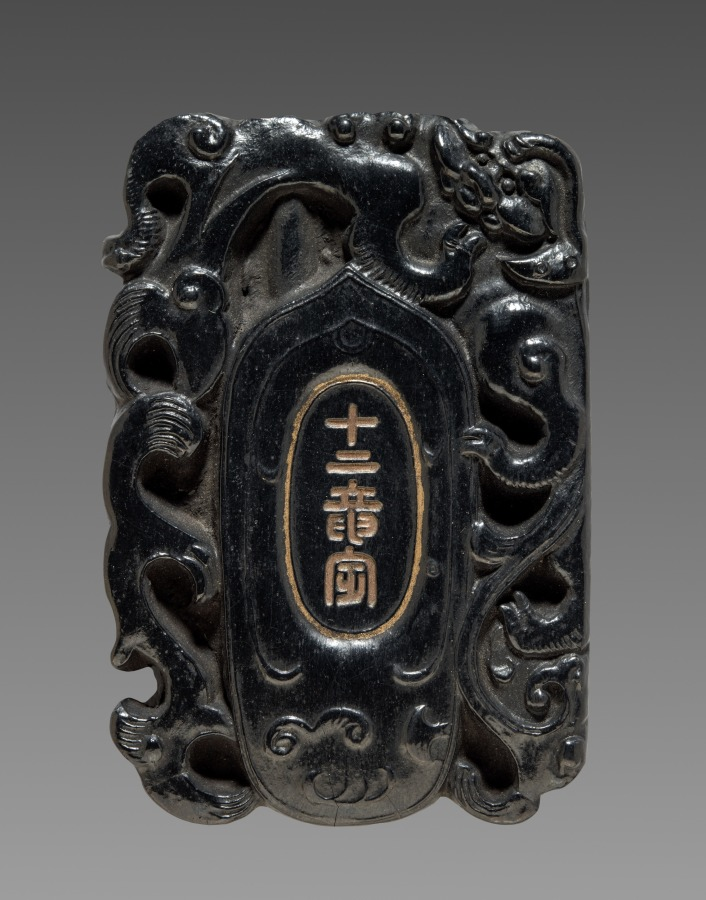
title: Ink Cake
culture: China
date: 1800s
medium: ink cake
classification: Miscellaneous